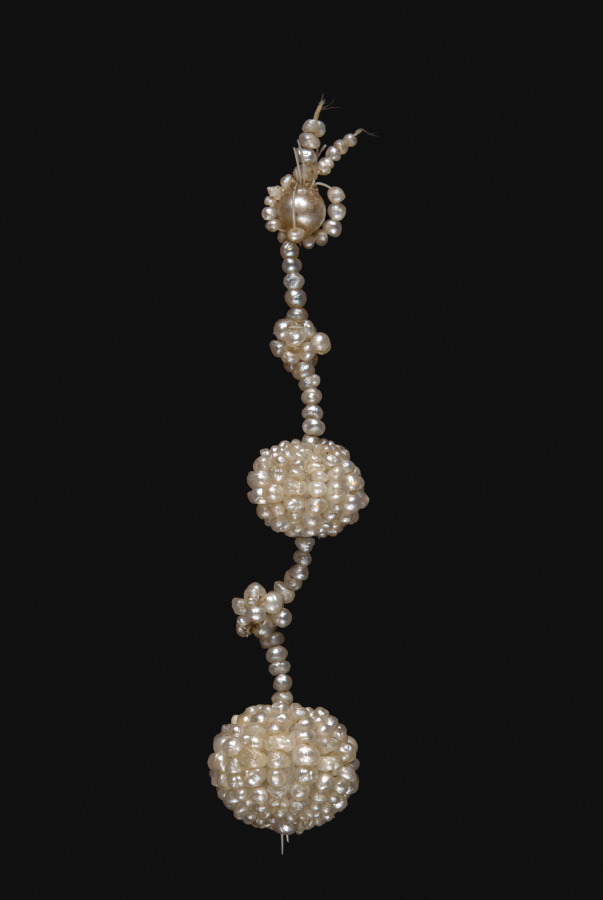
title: Earring (Parure)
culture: England, 19th century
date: c. 1850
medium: seed pearl on Mother-of-Pearl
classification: Jewelry